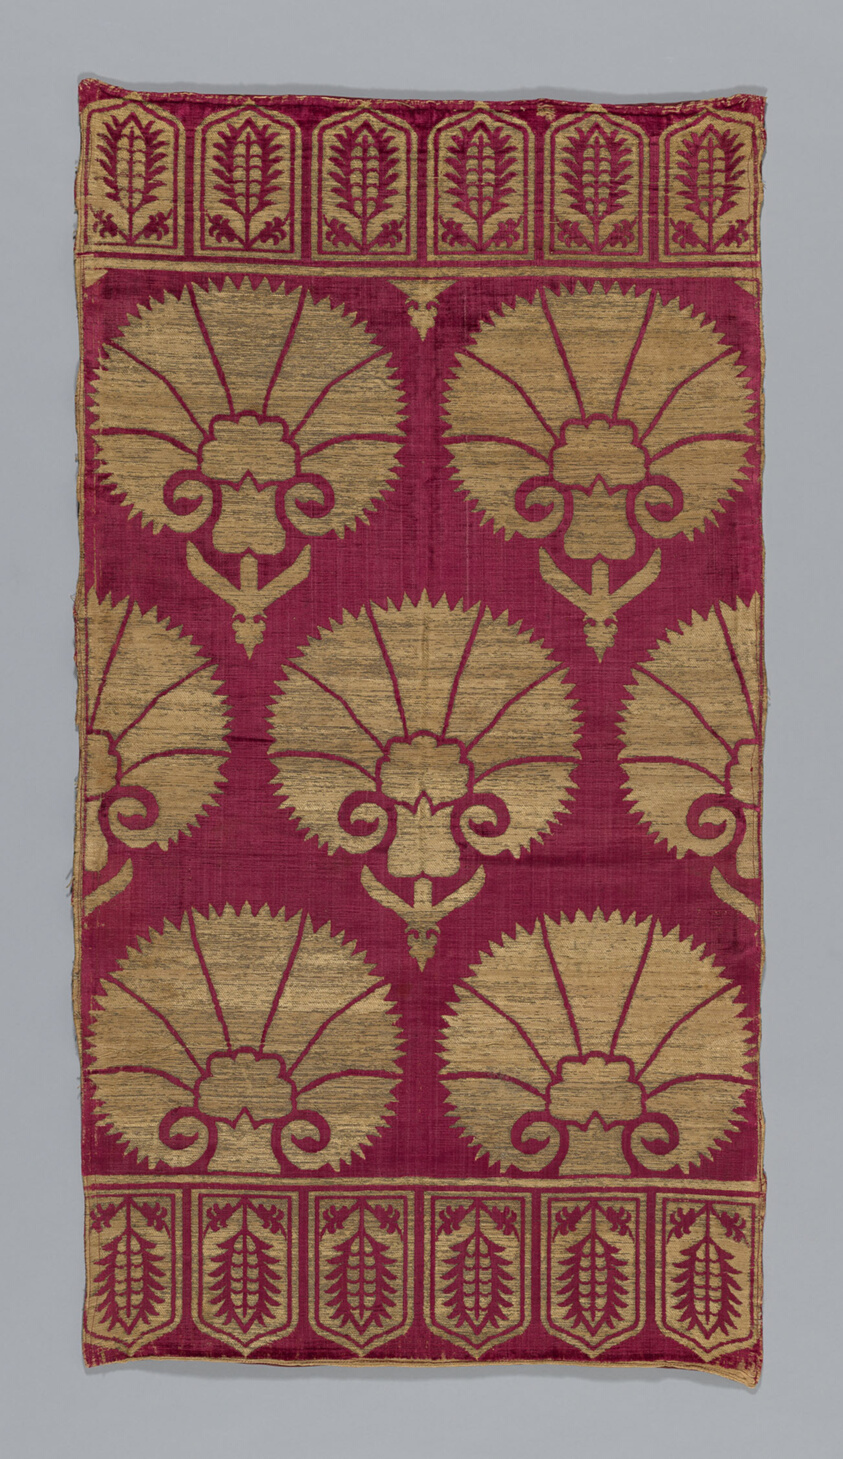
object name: Textile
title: Cushion cover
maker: Turkey, Bursa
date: 1601/50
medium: Silk, velvet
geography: Turkey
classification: textile; weaving - velvet